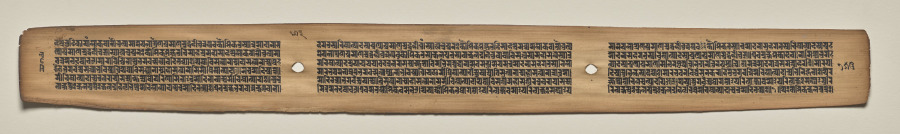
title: Text, Folio 153 (verso), from a Manuscript of the Perfection of Wisdom in Eight Thousand Lines (Ashtasahasrika Prajnaparamita-sutra)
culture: Eastern India, Bihar, Vikramashila Monastery. Painting: Nepal, Kathmandu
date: Sunday, September 14, 1119 (year 239 of the Newar Samvat in the month of Ashvina)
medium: gum tempera and ink on palm leaves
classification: Painting